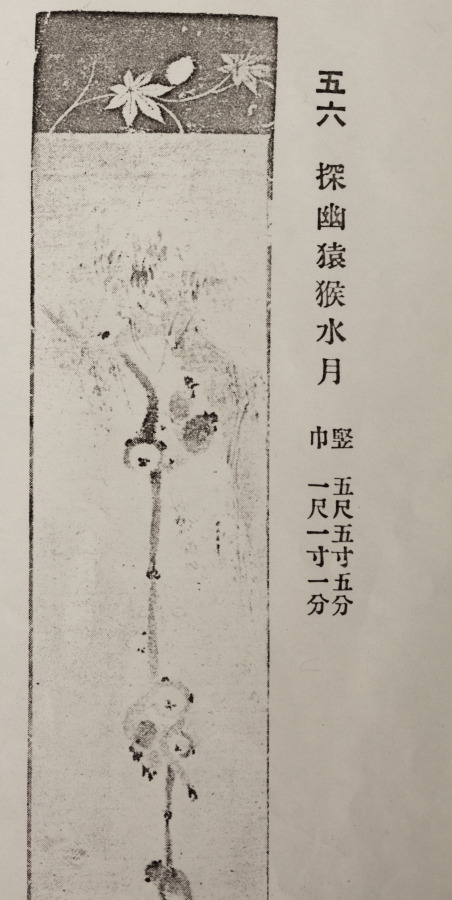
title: Gibbons Reaching for the Moon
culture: Japan, Edo period (1615–1868)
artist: Kano Tan’yū (Japanese, 1602–1674)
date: 1600s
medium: Hanging scroll; ink and light color on silk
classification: Painting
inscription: signed: "Tan'yūsai hitsu"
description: Long-armed gibbons form a chain to reach down from a tree, hoping to touch what they believe is the moon. In fact, the orb remaining beyond their grasp is the full moon’s reflection in the still surface of a pond or lake. The image is a common metaphor for the deluded mind in Buddhist thought. Gibbons do not live in Japan but were known to Japanese painters of the premodern era through paintings brought from China.